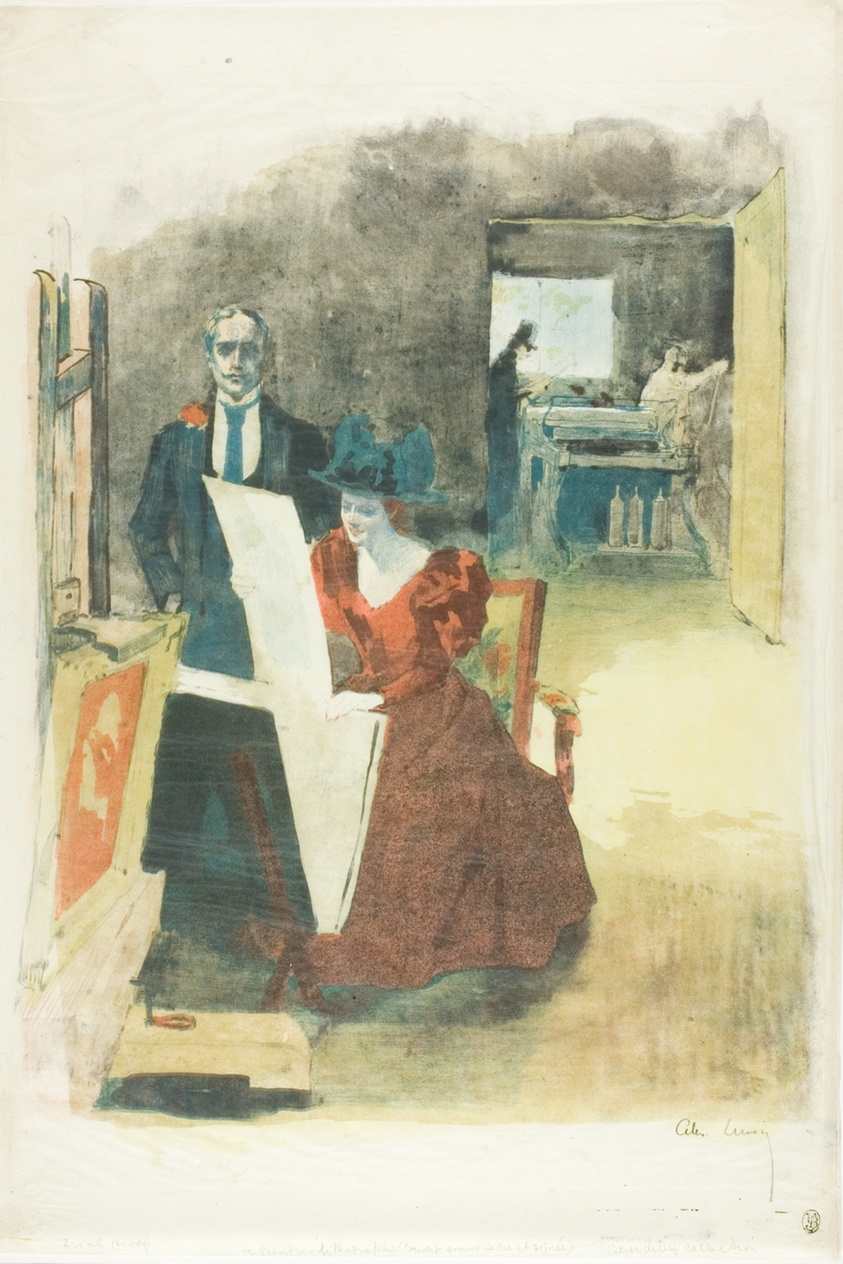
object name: Print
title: Cover for the portfolio, The Painters-Lithographers (Les Peintres Lithographes)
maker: Alexandre Lunois (French, 1863-1916)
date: 1892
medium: Lithograph in yellow, black, orange-red, blue-green, and olive on cream wove paper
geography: France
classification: lithograph; print; prints and drawing